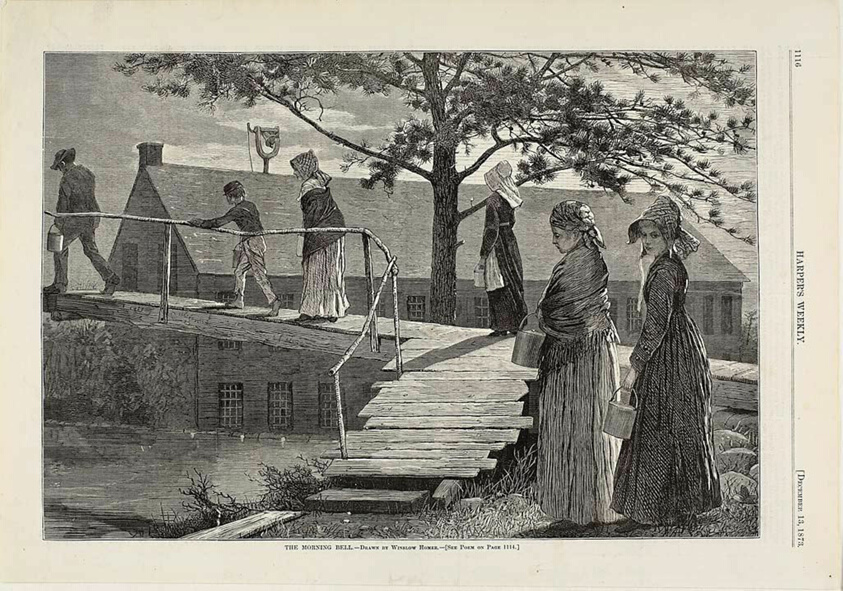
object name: Print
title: The Morning Bell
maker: Winslow Homer (American, 1836-1910); published by Harper's Weekly (American, 1857-1916)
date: published December 13, 1873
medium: Wood engraving on paper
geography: United States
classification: wood engraving; print; prints and drawing